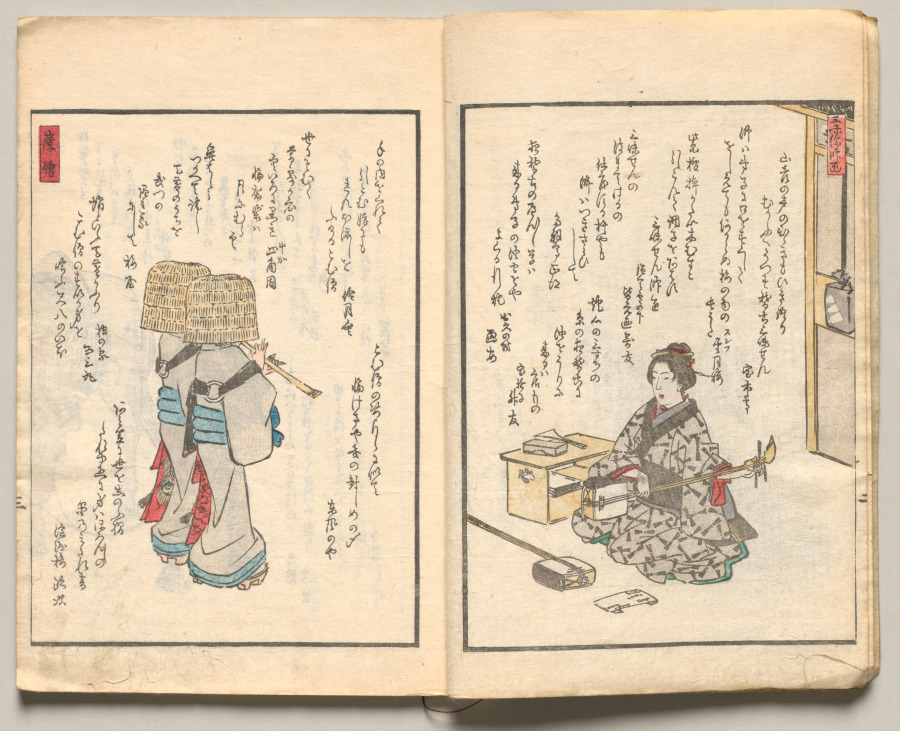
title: Spread Three from Volume Five of People of Japan in Light Verse (Kyōka)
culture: Japan, Edo period (1615–1868)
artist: Utagawa Hiroshige (Japanese, 1797–1858)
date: 1857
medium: Woodblock-printed book; ink and color on paper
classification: Bound Volume